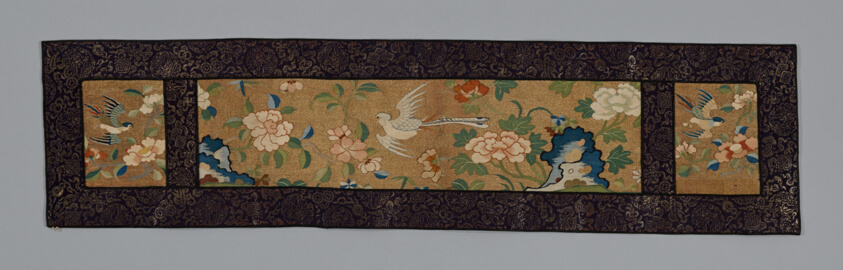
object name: Textile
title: Valance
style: ming, Chinese (culture or style), East Asian, asian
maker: China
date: Ming dynasty (1368–1644), 1600/40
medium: Gold Ko'ssu strip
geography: China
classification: textile; weaving